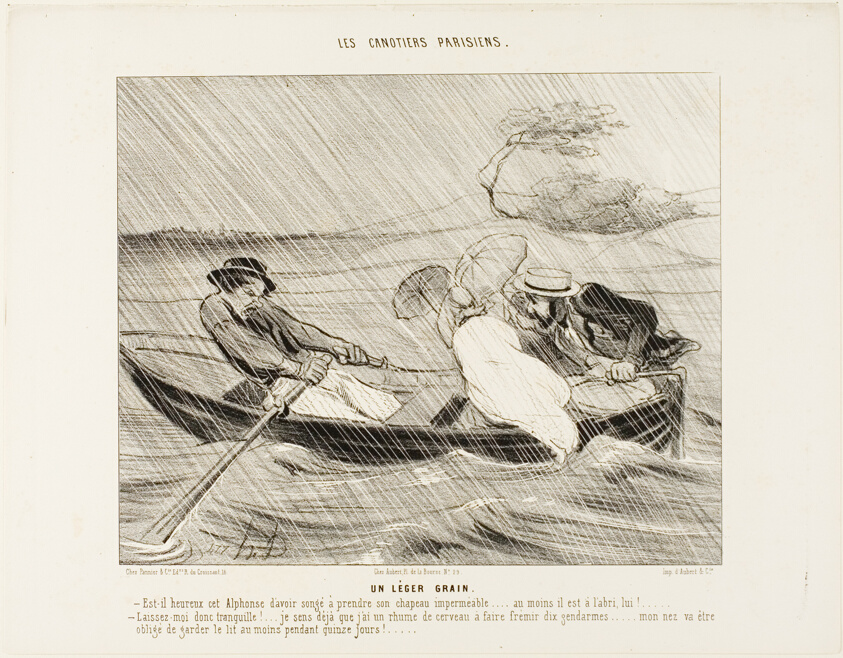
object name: Print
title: A Light Squall (Un leger grain), plate 8 from The Parisian Boaters (Les canotiers Parisiens)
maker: Honoré Victorin Daumier; French, 1808-1879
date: 1843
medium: Lithograph in black on ivory wove paper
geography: France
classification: lithograph; print; prints and drawing